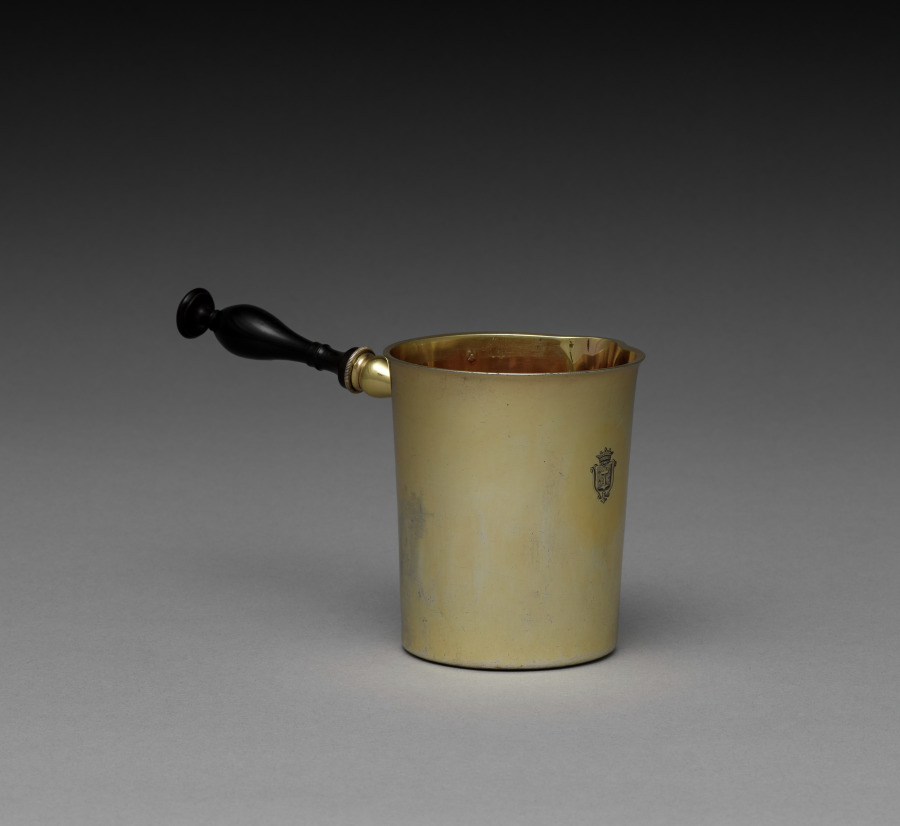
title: Chocolate Pot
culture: France, 19th century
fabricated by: Sixte-Simon Rion (French)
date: c. 1830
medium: silver, wooden handle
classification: Silver